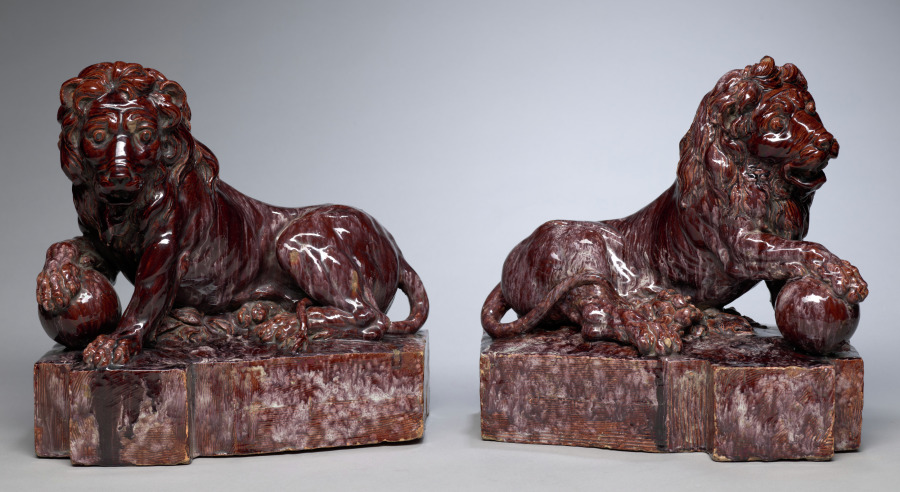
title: Pair of Lions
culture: France, 20th century (?)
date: 1900s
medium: terracotta glazed in mottled purple tin glaze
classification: Ceramic